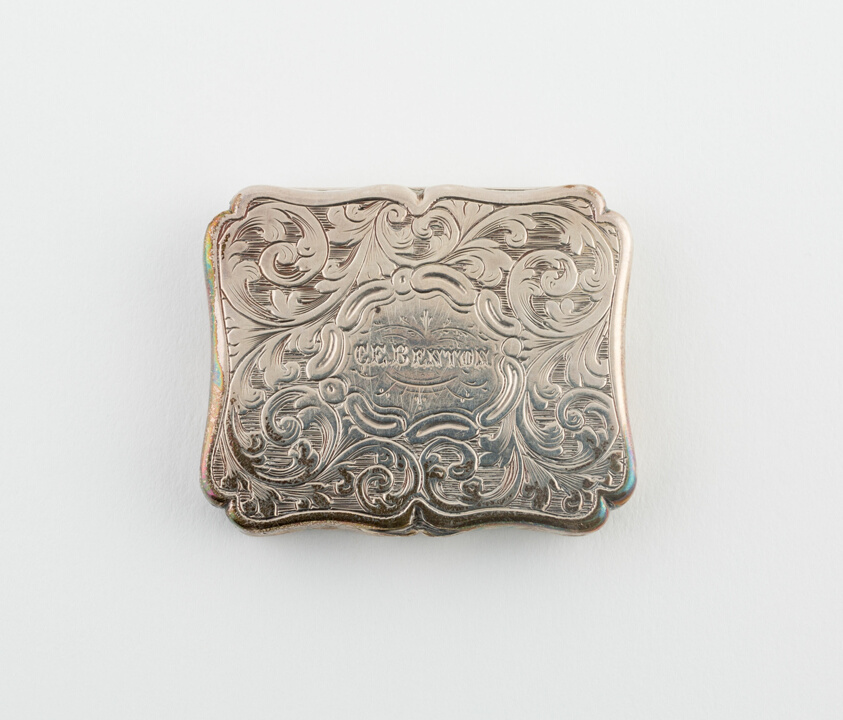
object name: Metalwork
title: Vinaigrette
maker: Birmingham, England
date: 1840/41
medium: Silver and silver gilt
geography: Birmingham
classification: container for personal use; vinaigrette (container for health care); european decorative arts; metalwork; silver; decorative object/ornament